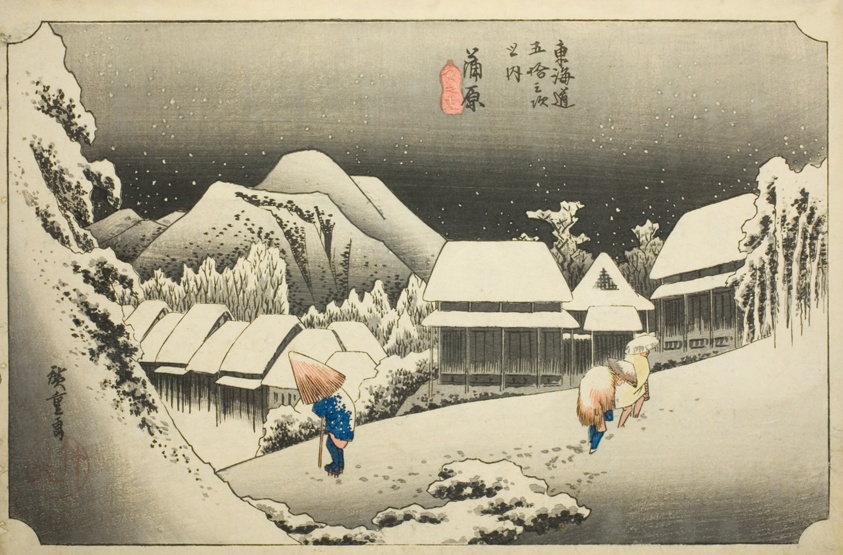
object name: Print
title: Kanbara: Evening Snow (Kanbara, yoru no yuki), from the series "Fifty-three Stations of the Tokaido (Tokaido gojusan tsugi no uchi)," also known as the Hoeido Tokaido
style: Japanese (culture or style)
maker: Utagawa Hiroshige 歌川 広重; Japanese, 1797-1858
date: c. 1833/34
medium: Color woodblock print; oban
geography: Japan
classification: woodblock print; print; asian art